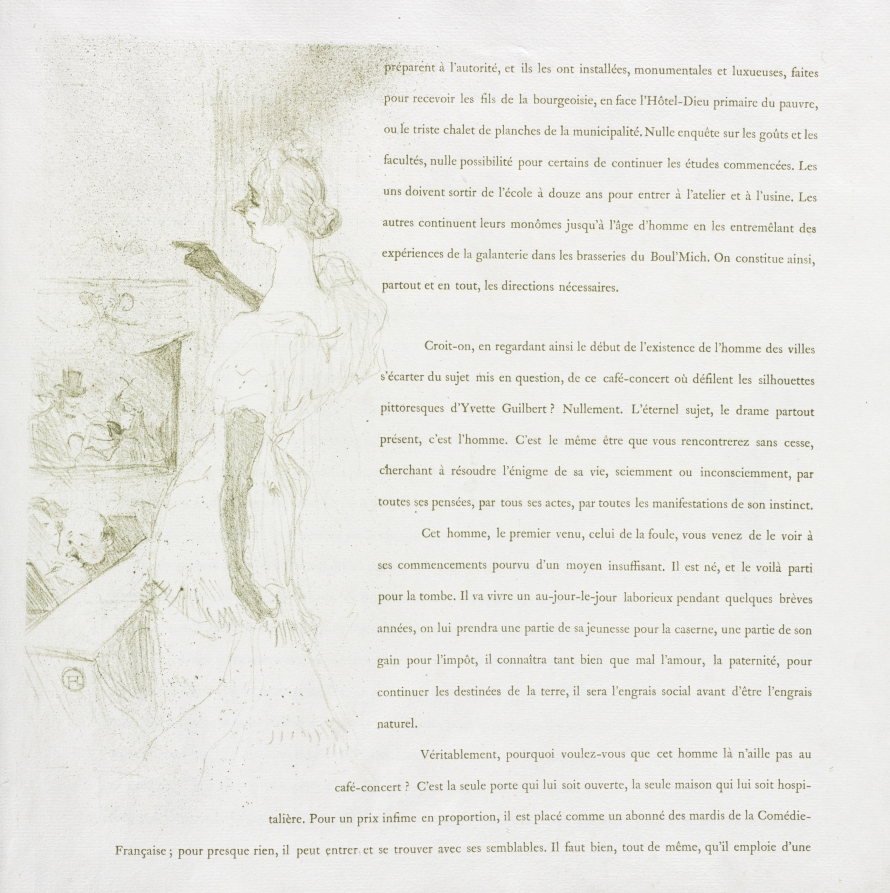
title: Yvette Guilbert-French Series: No. 6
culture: France, 19th century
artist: Henri de Toulouse-Lautrec (French, 1864–1901)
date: 1894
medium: lithograph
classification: Bound Volume